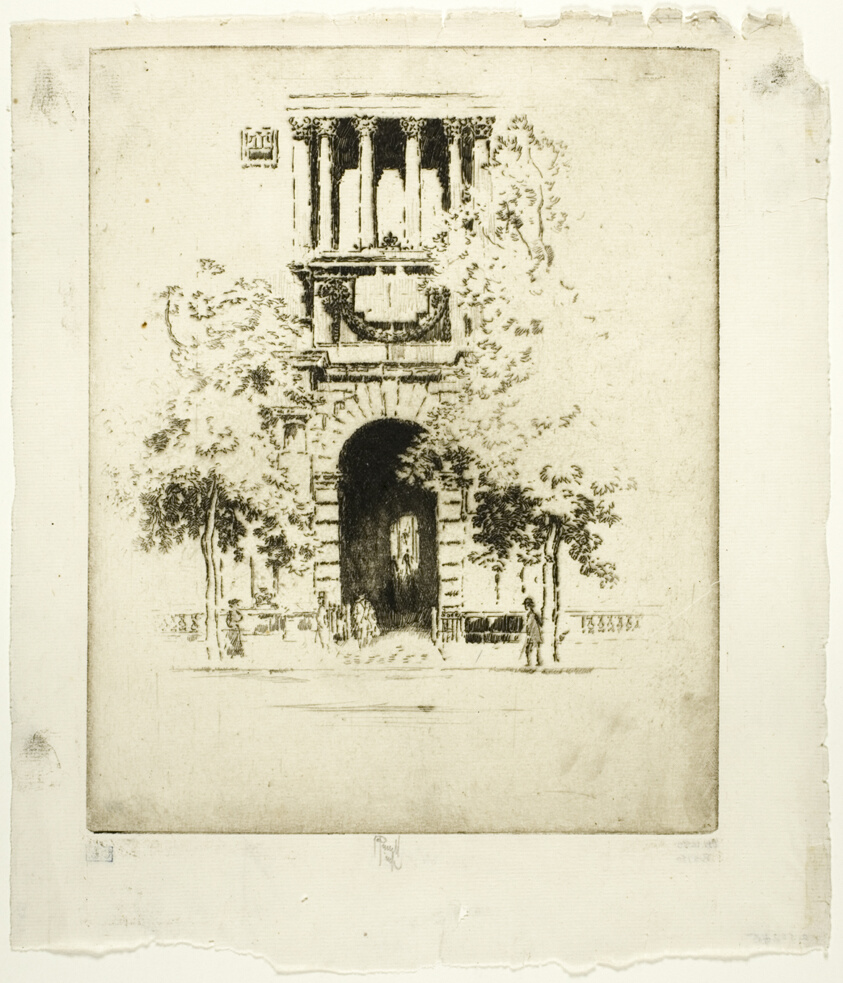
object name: Print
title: King's College, Embankment Gate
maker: Joseph Pennell (American, 1857-1926)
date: 1906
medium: Etching on ivory laid tissue paper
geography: United States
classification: etching; print; prints and drawing